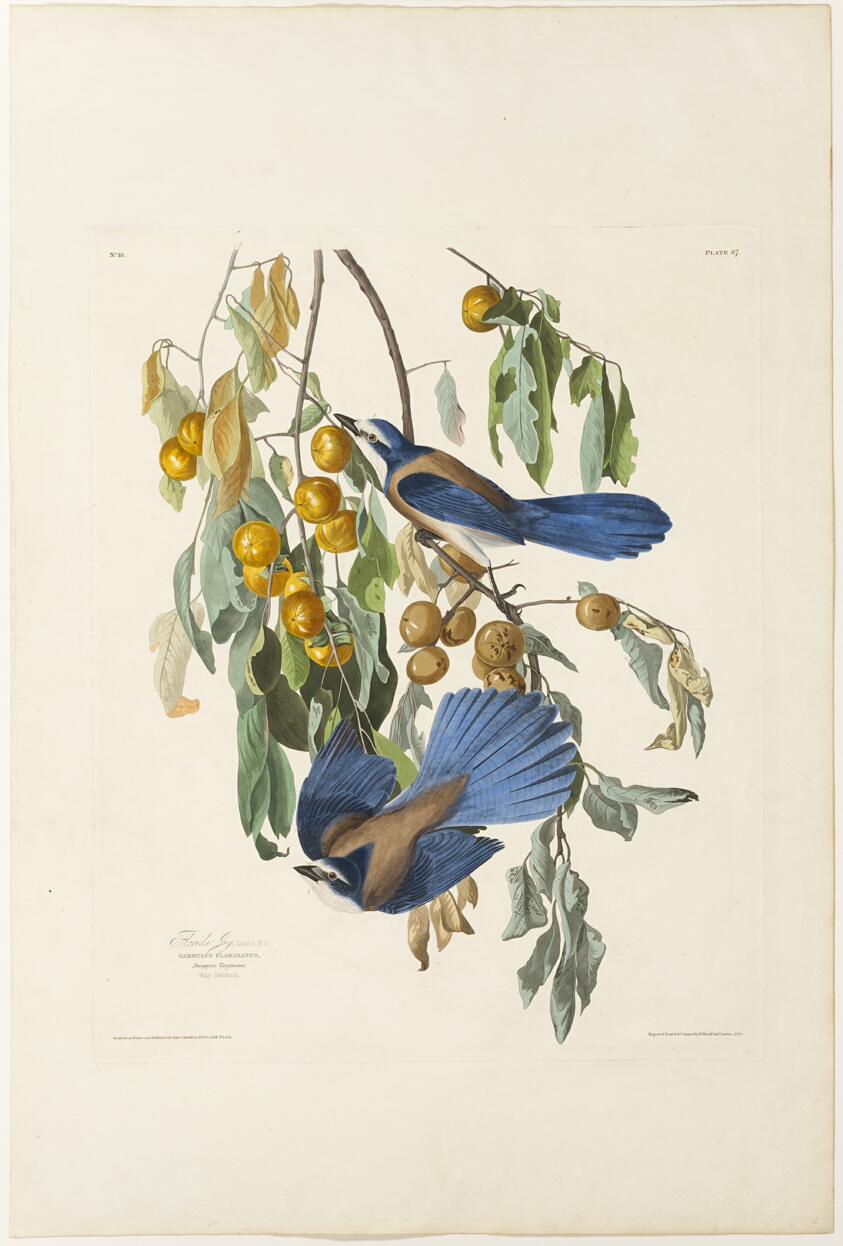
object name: Print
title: Florida Jay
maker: Robert Havell (English, 1793-1878); after John James Laforest Audubon (American, 1785-1851)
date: 1830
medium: Hand-colored engraving, with aquatint, on ivory wove paper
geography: England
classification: etching; print; prints and drawing